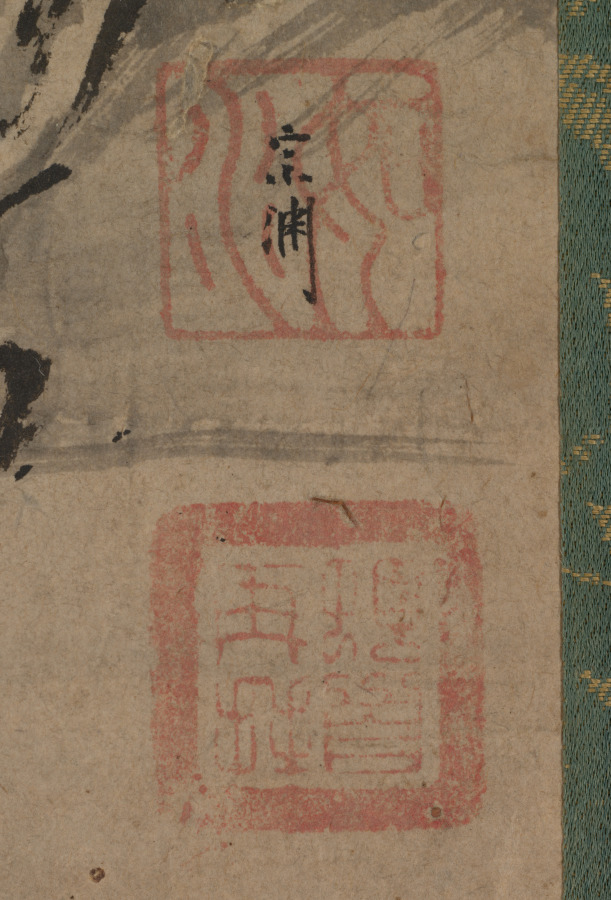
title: Chinese Literatus in an Autumn Landscape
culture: Japan, Muromachi period (1392–1573)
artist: Josui Sōen (Japanese, active c. 1489–1500)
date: late 1400s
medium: hanging scroll; ink on paper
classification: Painting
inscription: Signed: "Sō'en" 宗淵. Sealed: "Josui" 如水; one seal unread.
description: In this painting, Sesshū Tōyō’s disciple Sōen depicts a Chinese scholar-official astride a donkey with his attendant behind. Framing their passage on the right side of the scene are two bare willows, and on the left, geese in flight, the cries of which capture the pair’s attention. These elements suggest that the season is late autumn. Sōen, who famously received Sesshū’s 1495 Splashed-ink Landscape as a certificate of his success as a pupil, studied with the master in Suō, presentday Yamaguchi, after which he returned to his native province in the Kanto region.